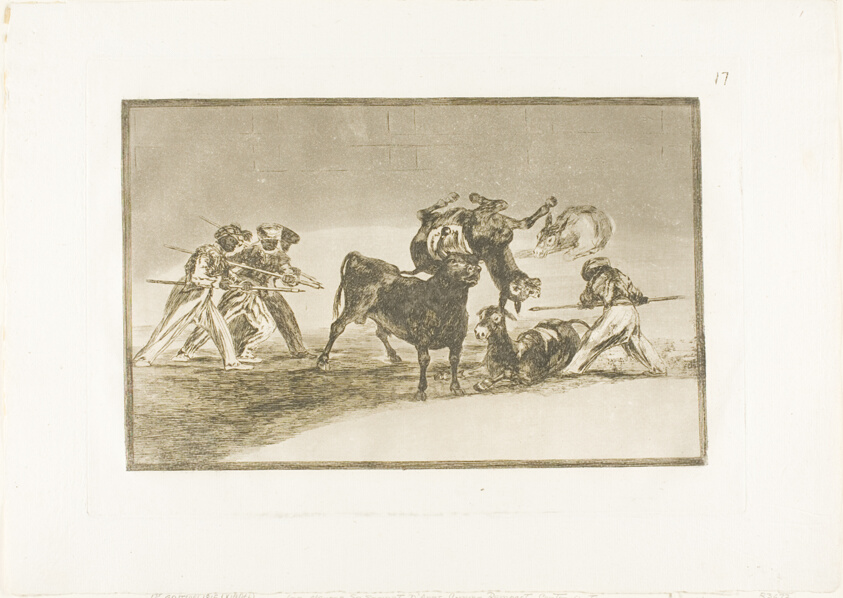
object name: Print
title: The Moors use donkeys as a barrier to defend themselves against the bull whose horns have been tipped with balls, plate 17 from The Art of Bullfighting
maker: Francisco José de Goya y Lucientes (Spanish, 1746-1828)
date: 1814/16, published 1816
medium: Etching, burnished aquatint, drypoint and burin on ivory laid paper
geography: Spain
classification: etching; print; prints and drawing